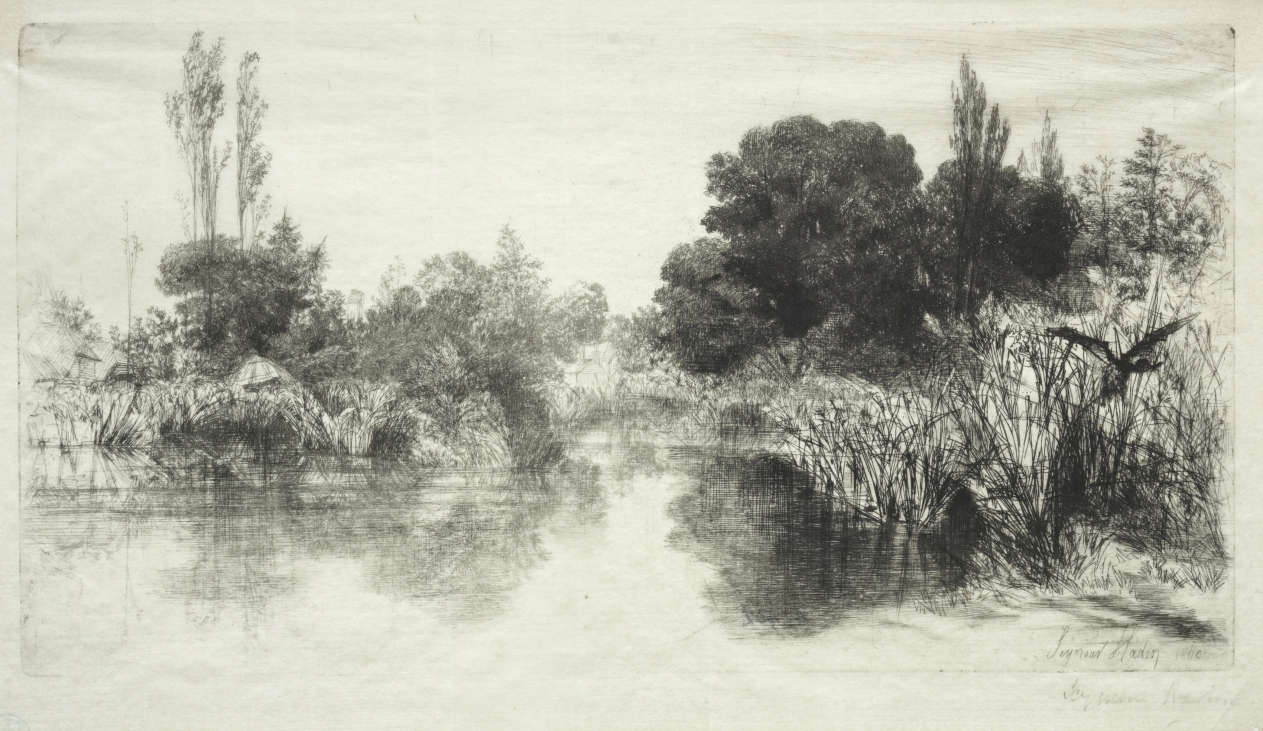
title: Shere Mill Pond (The Larger Plate)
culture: England, 19th century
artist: Francis Seymour Haden (British, 1818–1910)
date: 1860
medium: etching and drypoint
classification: Print